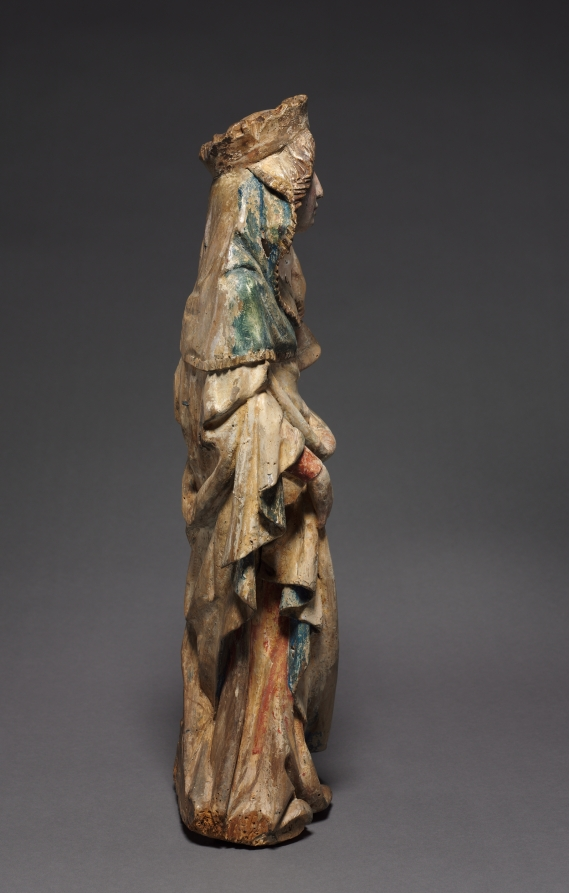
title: Madonna and Child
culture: Bohemia, vicinity of Freistadt, 15th century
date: c. 1400–1410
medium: lindenwood with polychromy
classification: Sculpture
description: This sculpture belongs to a type known as a Schöne Madonna or "Beautiful Virgin," popularized in central Europe during the late 1300s and early 1400s. The Virgin’s stance adheres to an S-curve as she stands with one leg straight and the other slightly bent at the knee. Her body is hidden beneath long, voluminous, draping garments. These so-called Beautiful Madonnas are among the most popular creations of Bohemian art and were in high demand for churches and private veneration.